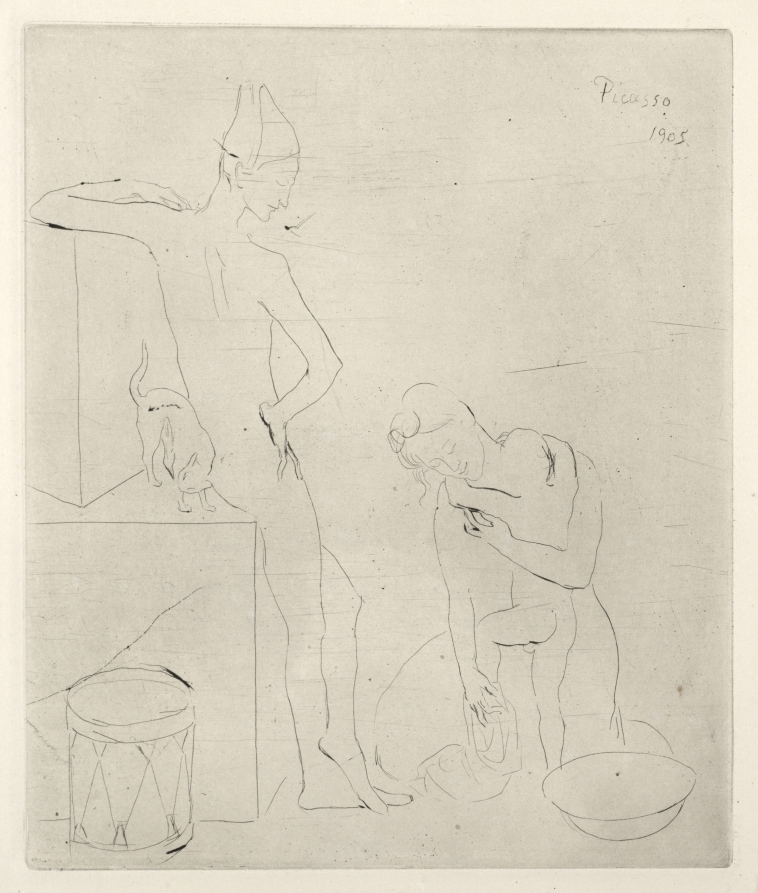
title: The Bath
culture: Spain, 20th century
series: The Saltimbanques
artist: Pablo Picasso (Spanish, 1881–1973)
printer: Louis Fort (French, active 1800s–1900s)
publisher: Ambroise Vollard (French, 1867–1939)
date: 1905, printed 1913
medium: drypoint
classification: Print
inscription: Signed, upper right, in plate: Picasso / 1905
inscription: Watermark: VAN GELDER ZONEN